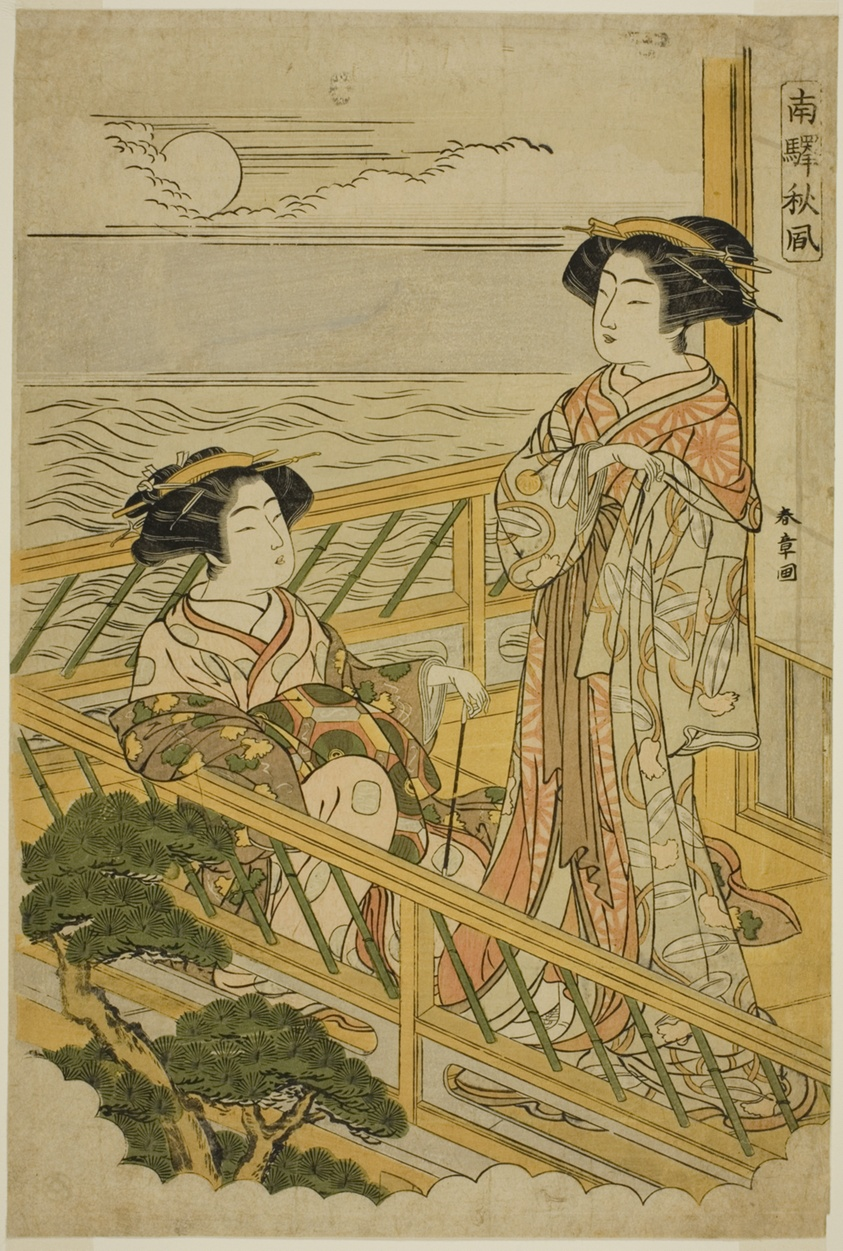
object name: Print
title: Two Courtesans on a Moonlit Balcony at a House of Pleasure in Shinagawa, from the series "Nan'eki Shufu"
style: Japanese (culture or style)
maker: Katsukawa Shunsho 勝川 春章; Japanese, 1726-1792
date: c. 1774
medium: Color woodblock print; oban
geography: Japan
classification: woodblock print; print; asian art